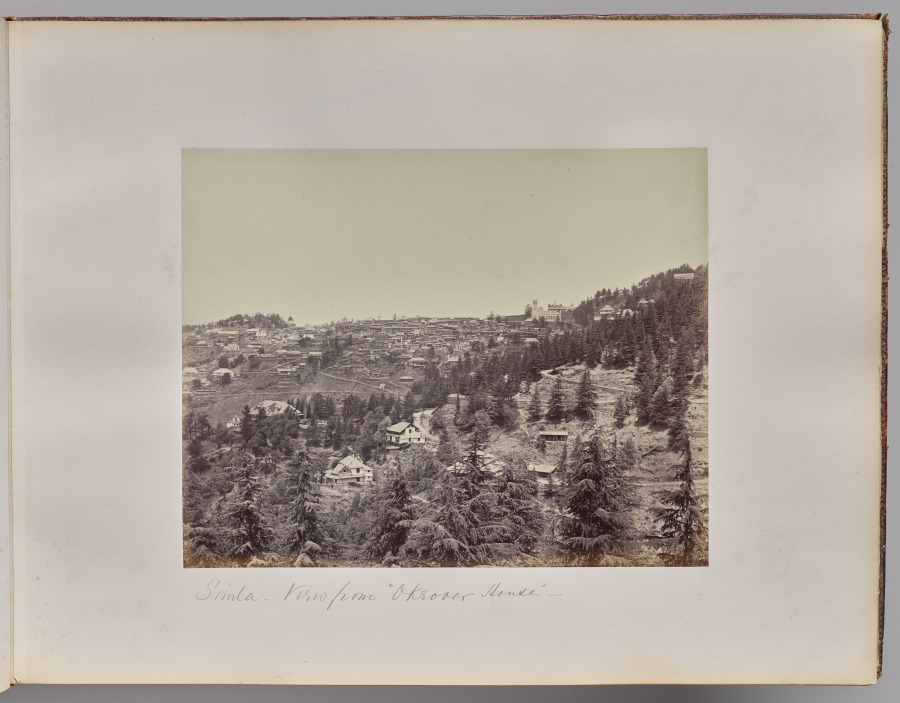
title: Shimla. View from Oakover House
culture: England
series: Photographs of Northern India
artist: Samuel Bourne (British, 1834–1912)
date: 1863–70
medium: albumen print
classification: Photograph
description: The 50 images in this album, all taken in the 1860s, move from the hill towns of the Himalayas down to cities including Lahore (now in Pakistan), Delhi, Lucknow, Agra, Benares (now Varansi), and Calcutta (now Kolkata). Architectural studies of major monuments offer valuable historical records of what sites such as the Taj Mahal and the imperial mosque of the Mughal emperors in Delhi looked like before 20th-century restorations.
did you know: Samuel Bourne, the author of most the images in this album, was a banker in England before he moved to India to become a professional photographer.